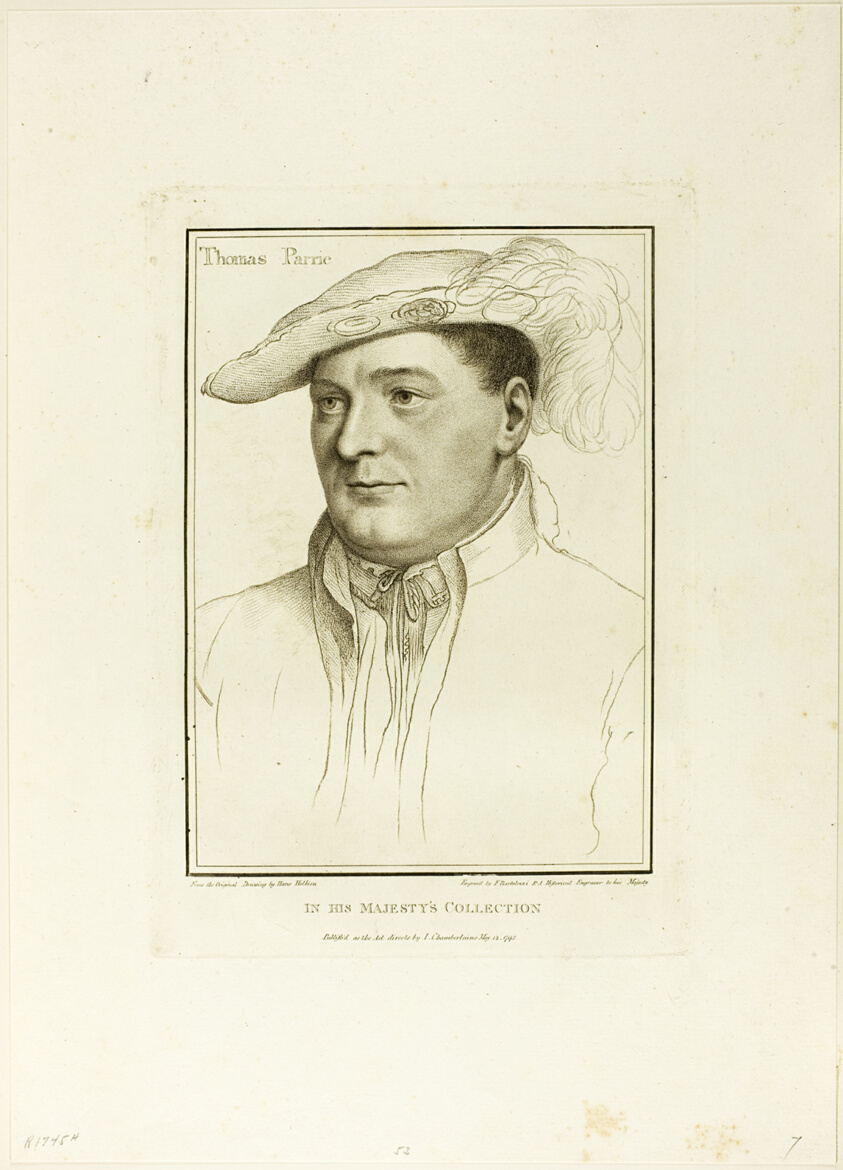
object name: Print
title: Sir Thomas Parry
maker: Francesco Bartolozzi (Italian, 1727-1815); after Hans Holbein the younger (German, 1497-1543)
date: May 12, 1793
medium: Stipple engraving on cream wove paper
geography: Italy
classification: engraving; print; prints and drawing